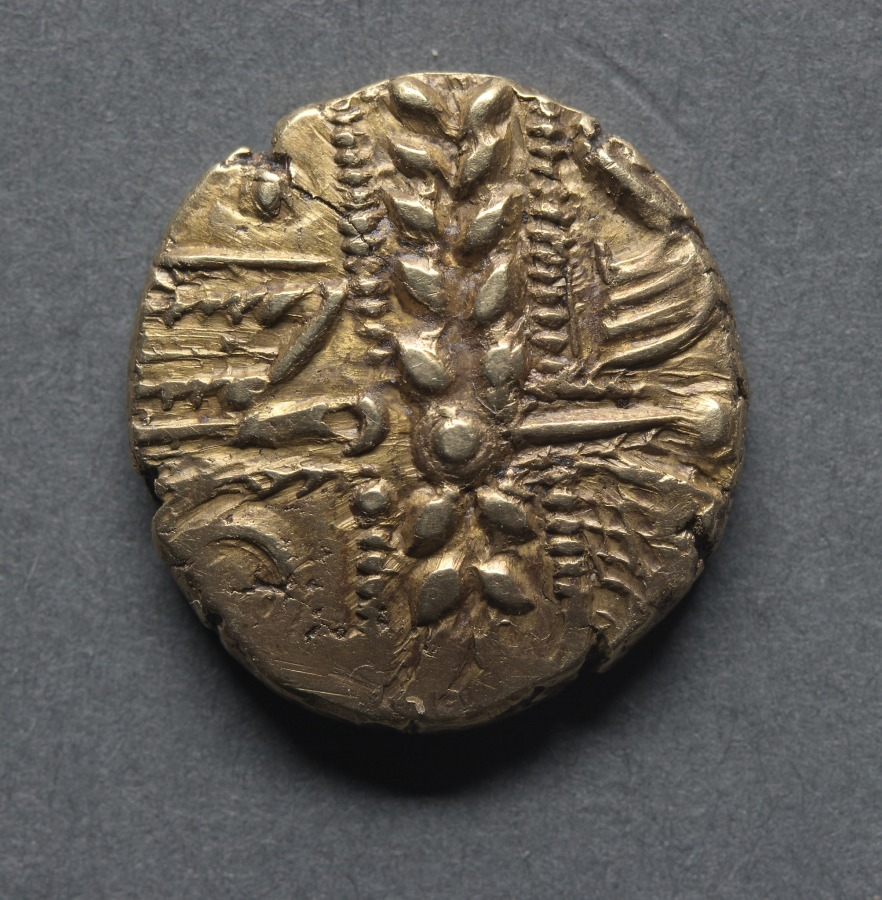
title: Stater: Wreath, Cloak, and Crescents (obverse); Horse and Wing Motif (reverse)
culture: England, Catuvellauni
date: c. 60–20 BCE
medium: gold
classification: Coins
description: This particular type of stater received its type name, Whaddon Chase, from a hoard of over 320 such pieces which were turned up by a plow in a field called Narbury on the Whaddon Hall estate, Buckinghamshire, on February 14, 1849. The surrounding countryside is known as Whaddon Chase, the name still in use today. This area is well within the territory of the Catuvellaunia.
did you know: The fortunes of the Catuvellauni and their kings can be traced through ancient coins.